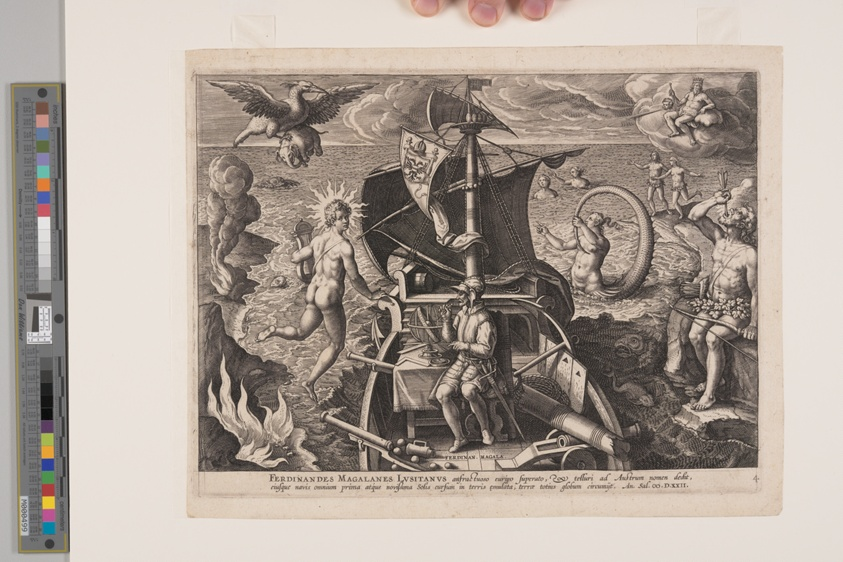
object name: Print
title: Magellan Seated on Deck, from Americae Retectio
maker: Adriaen Collaert (Flemish, c. 1560–1618); after Jan van der Straet (Flemish 1523–1605)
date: c. 1589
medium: Engraving on ivory laid paper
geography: Flanders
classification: engraving; paper; print; prints and drawing